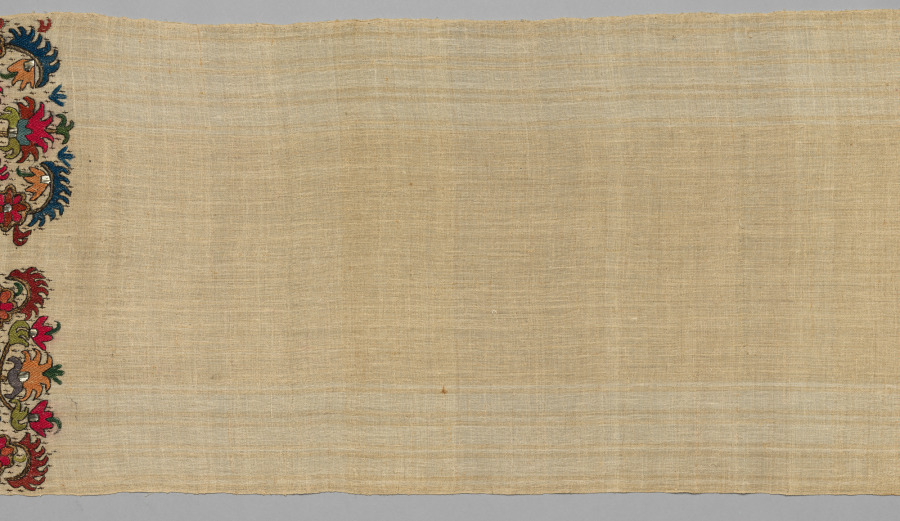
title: Towel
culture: Greece, Sporades Islands, Skyros, 18th century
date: 1700s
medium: embroidery in silk, gold and silver threads on natural linen ground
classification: Embroidery